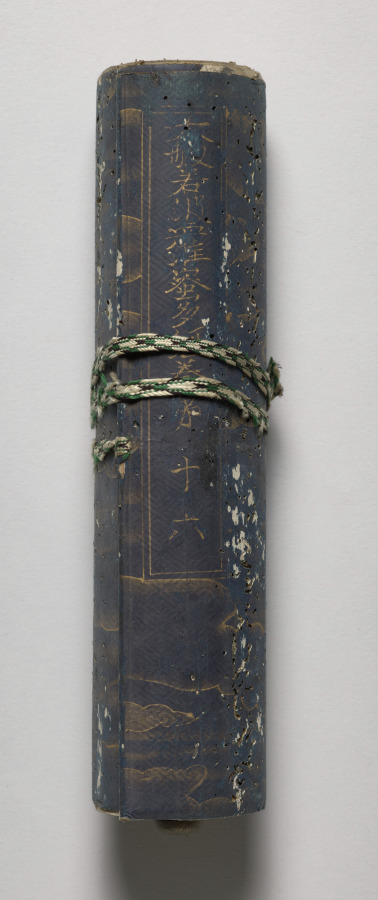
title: Volume from the Great Perfection of Wisdom Sutra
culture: Japan, Heian period (794–1185)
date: late 1100s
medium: Handscroll; ink and gold on dyed paper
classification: Manuscript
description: This scroll is part of the 600-volume Great Perfection of Wisdom Sutra. The sacred text addresses the perfection of wisdom and the nonsubstantiality of all phenomena, or the emptiness of all things. It takes the form of Shakyamuni Buddha’s preaching at four locations. This scroll is from the Perfection of Wisdom in 100,000 Lines, which occupies the first 400 volumes. At one time, religious clergy kept all the scrolls in a lacquered wood repository on view nearby. They are now too fragile to open and we will conserve them over time.